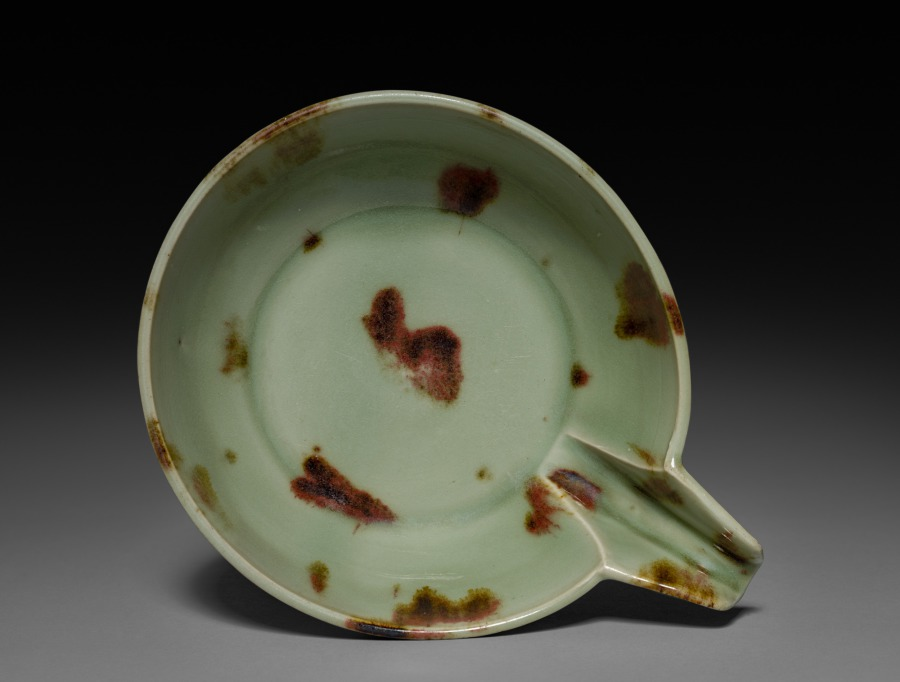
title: Spouted Bowl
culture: China, Zhejiang province, Longquan region, Yuan dynasty (1271-1368)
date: 1300s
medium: Celadon-glazed stoneware spotted with copper red, Longquan ware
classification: Ceramic